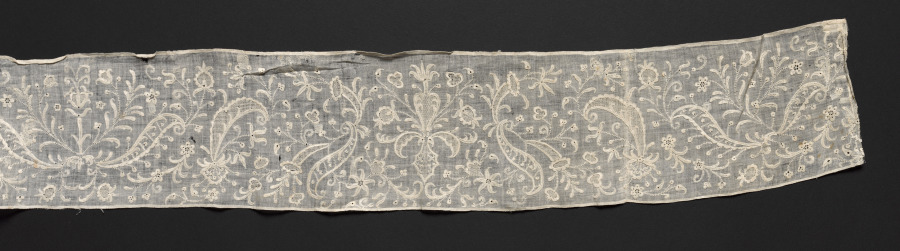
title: Band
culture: France(?)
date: 1700s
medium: Plain weave linen: needle lace (drawnwork) and embroidery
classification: Embroidery